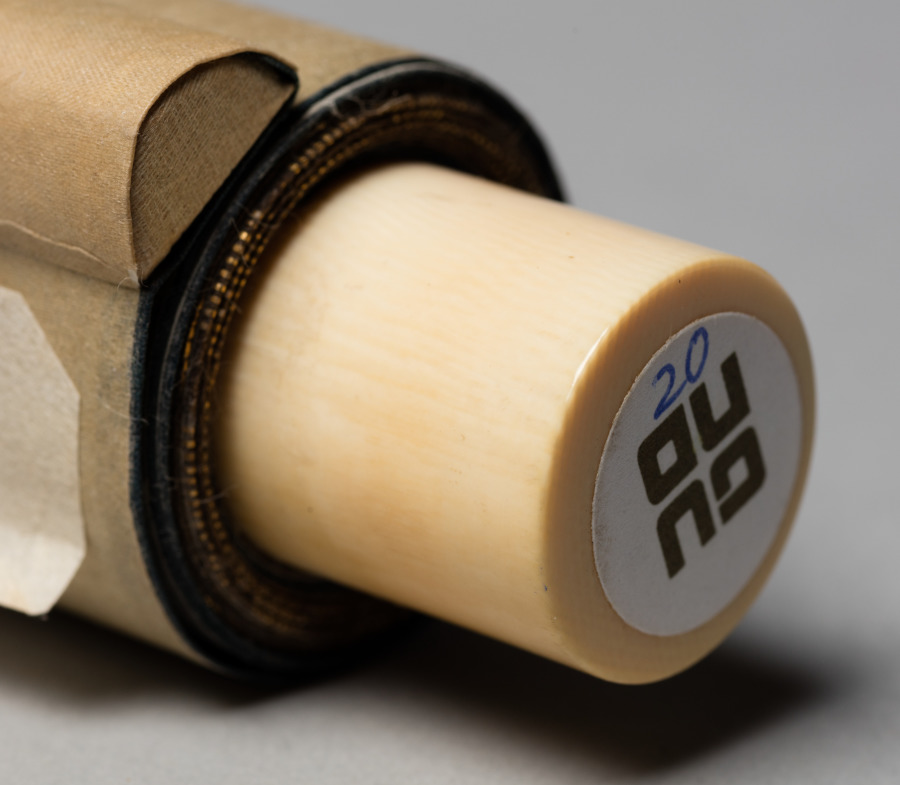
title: Sparrows and Bamboo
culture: Japan, Muromachi period (1392–1573)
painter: Shiken Saidō (Japanese, 1486–1581)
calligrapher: calligraphy by Ekkei Reikaku (Japanese, d. 1609)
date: mid- to late 1500s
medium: hanging scroll; ink on paper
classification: Painting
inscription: signed: Ekkei Reikaku daishi owaru inscription sealed: Reikaku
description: Shiken Saidō, whose style name was Ze'an, was a Zen monk who trained at Shōkokuji temple in Kyoto, and designed the garden of Reiun’in at Myōshinji temple. He painted landscapes in the style of painter and art advisor to the shogun, Sōami (died 1525), as well as bird-and-flower compositions. A poetic inscription by the monk Ekkei Reikaku accompanies this gentle composition of two sparrows perched on bamboo.